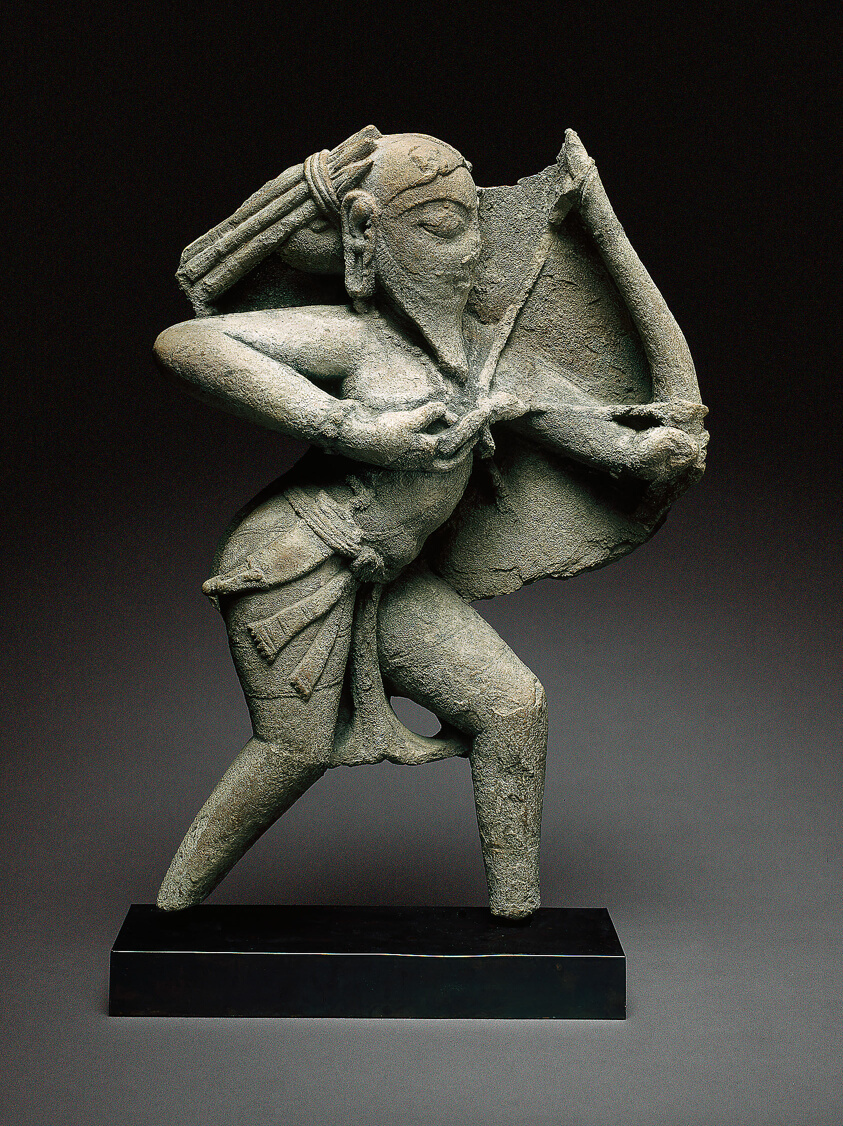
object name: Architectural fragment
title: Archer Stringing a Bow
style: South Asian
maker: India; Madhya Pradesh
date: 11th century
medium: Sandstone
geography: Madhya Pradesh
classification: stone (unidentified); stone; sculpture; asian art; architectural fragment